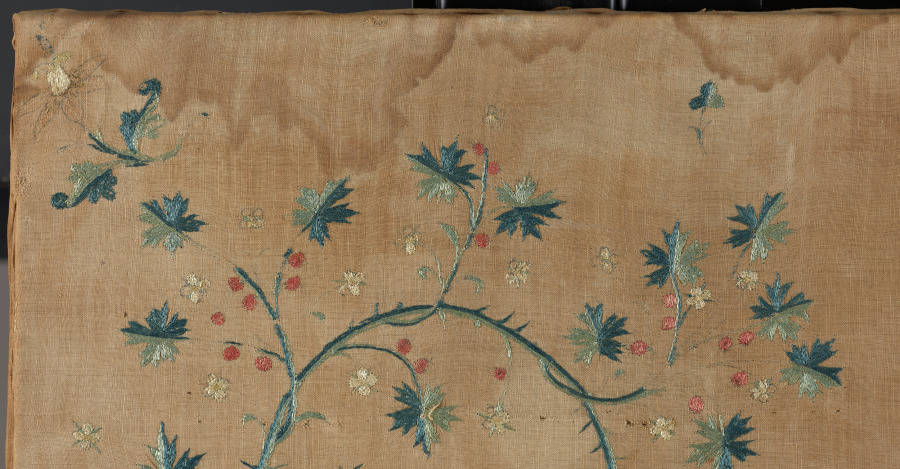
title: Christ Gathering Roses, Centerpiece of an Altar Cloth(?)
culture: Germany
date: early to mid-1400s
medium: Linen: plain weave; silk: embroidery (split stitch)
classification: Embroidery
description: The altar cloth was probably made for a southern German convent in the 15th century. While the focus on the Christ child is typical for female spirituality in the late Middle Ages, there are no comparative examples for the Christ child picking flowers. The detailed depiction of plants and flowers is of unusual quality for the embroideries of this period.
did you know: The Christ child has put aside his globe to devote himself entirely to picking flowers.